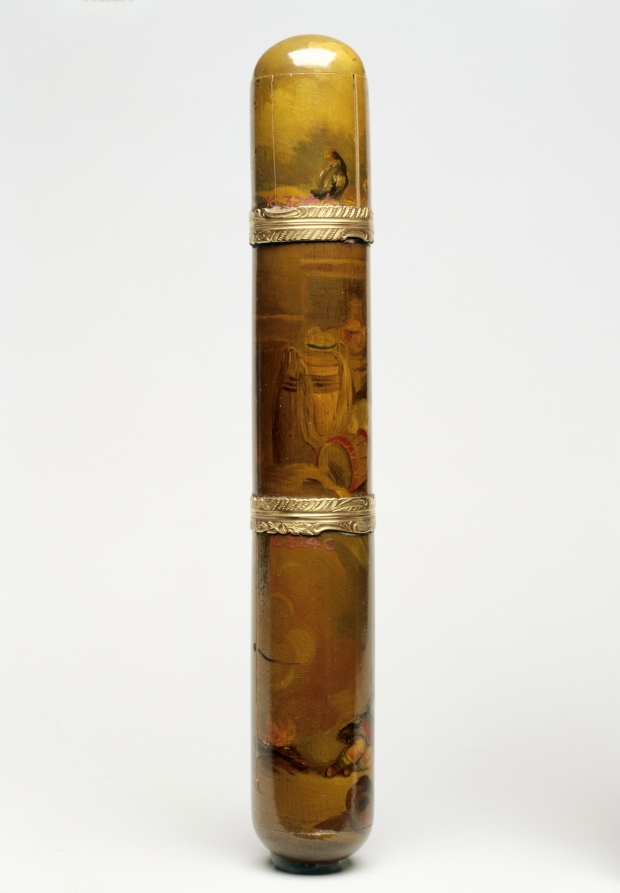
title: Perfume Case (Etui flaconnier)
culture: France, 18th century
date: c. 1780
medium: painted wood with gilt metal mounts, tortoiseshell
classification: Cosmetic Objects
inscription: Unmarked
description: Resting inside this case is a small octagonal crystal flask that would have held perfume. The painted miniatures are decorated with vernis martin, a popular varnish that imitated East Asian true lacquer. These scenes of rural merriment were often miniature reproductions of well-respected artists of the period. The depiction of three children and a dog on the lower portion of the case was drawn from Jean-Honoré Fragonard’s The Happy Family (L’heureuse fécondité) (1777).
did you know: Perfume was an important part of the French toilette, a lengthy ritual of washing and dressing practiced by members of the French social elite.